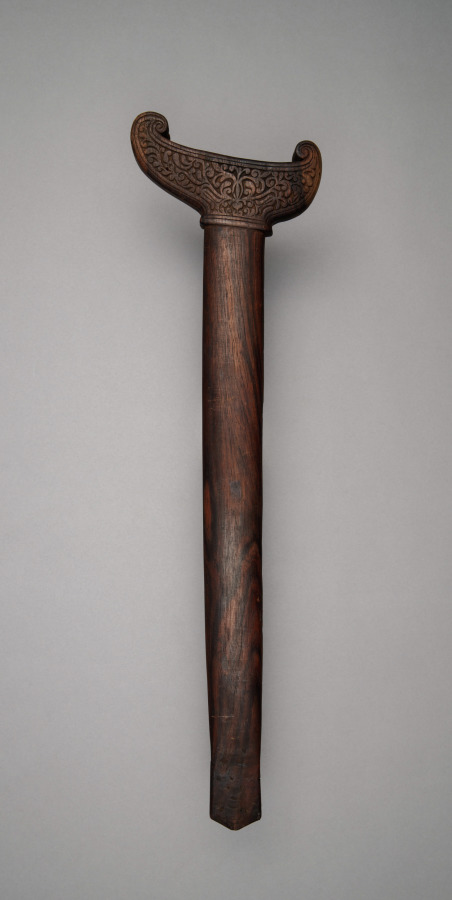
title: Scabbard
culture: Philippines, Mindanao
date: before 1916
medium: Hardwood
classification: Arms and Armor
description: The flaring, boat-shaped upper section of this scabbard is intricately decorated with vegetal scrollwork likely derived from the okir designs typical of the Maranao or Maguindanao people. The lower portion of the sheath is unadorned, highlighting the natural grain of the dark hardwood.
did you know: This sheath was designed to house a double-edged kalis (kris) blade.